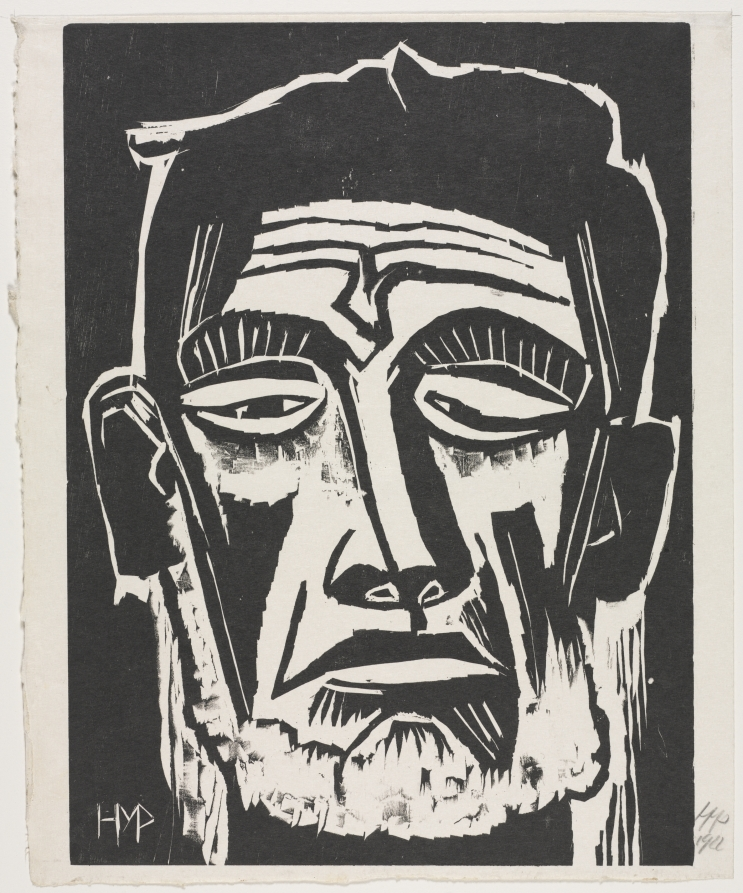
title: Head of a Fisherman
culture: Germany, 20th century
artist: Max Pechstein (German, 1881–1955)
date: 1922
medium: woodcut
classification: Print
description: Through portraits of rural workers including fishermen and farmers, Max Pechstein explored his interest in people whom he perceived as rugged and natural. Here, he capitalized on the rough-hewn character of the wood to enhance the fisherman’s strong features, using a gouge and cutting along the grain without any preparatory drawing. The result is a frank and immediate presentation of a wizened face that reveals years of arduous work at sea.